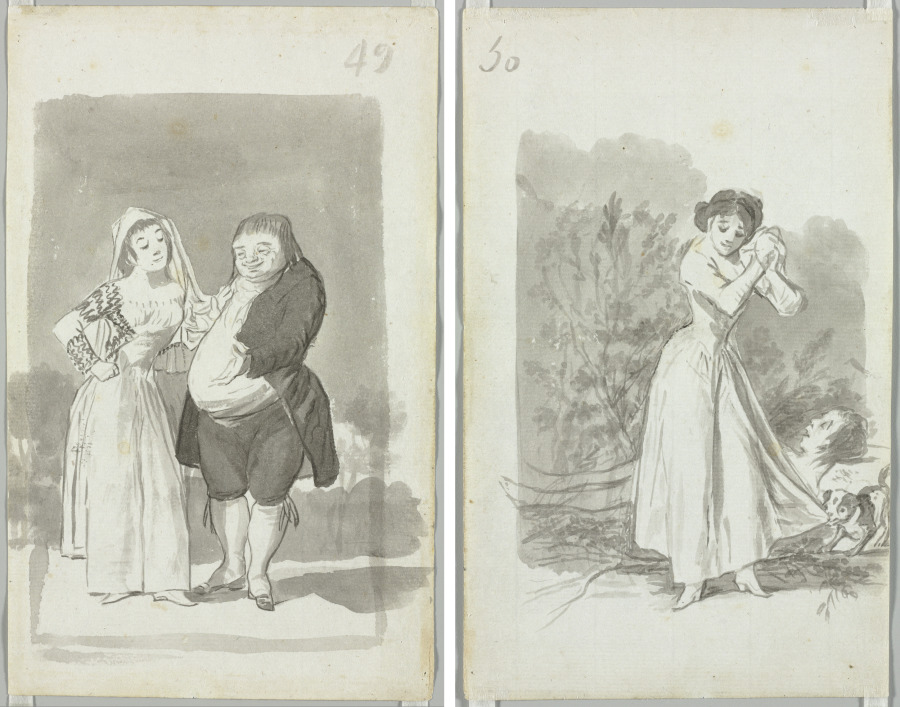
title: Young Woman (possibly a Sex Worker) with a Man (recto); Young Woman Wringing Her Hands over a Man's Naked Body (verso)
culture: Spain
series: Madrid Album "B"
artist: Francisco de Goya (Spanish, 1746–1828)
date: 1796–97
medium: brush and gray and black washes on laid paper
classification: Drawing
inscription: recto: by artist, upper right, in gray wash: 49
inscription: verso: by artist, upper left, in gray wash: 50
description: Among the great figures of the pictorial arts in the West, Francisco de Goya is one of the very few whose work as a graphic artist is arguably even more important than his paintings. Alongside a prodigious output of prints, he created eight sketchbooks of drawings over the course of 30 years. This double-sided sheet comes from the so-called Album B, or Madrid Album, which, like all of them, was scattered throughout the world in public and private collections after his death. The drawings reveal Goya’s powers of invention and observation, and his biting satire. On the recto side of the sheet, a vulgar encounter between a prostitute and a pot-bellied lecher reveals the bluntness of the Goya’s social criticism. The verso drawing is less easily pinned down, though it follows traditional iconography for representations of Saint Margaret of Cortona, a nobleman’s mistress who repented and entered a convent after her lover’s dog led her to his murdered corpse.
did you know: Much of Francisco de Goya's graphic output of drawings and prints was not made public until well after his death.